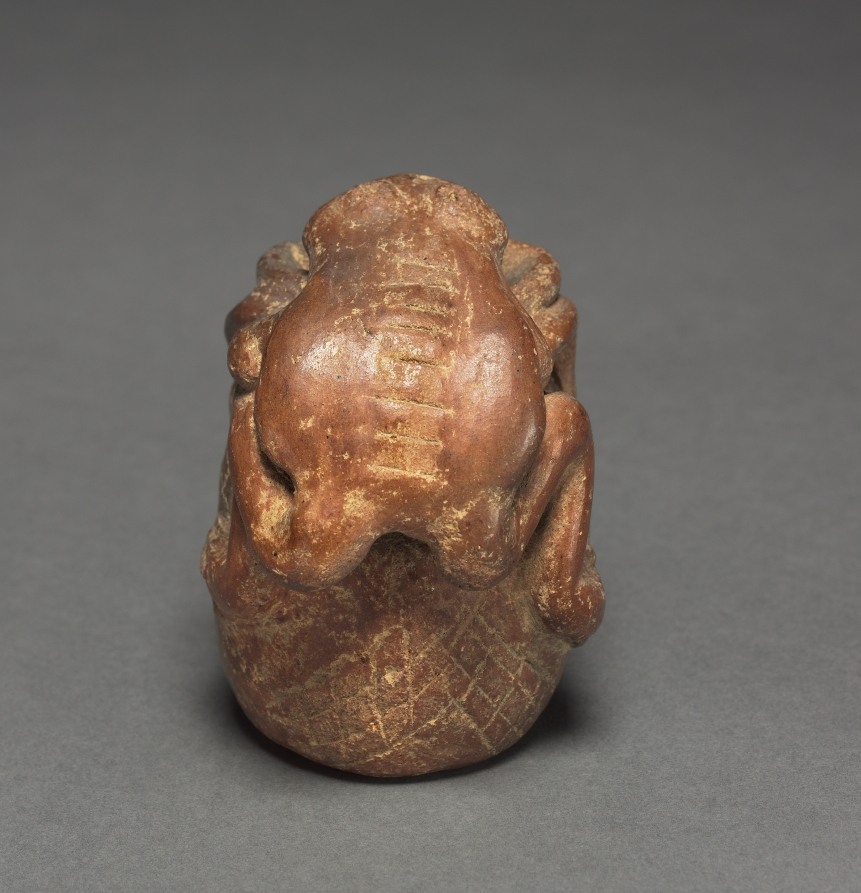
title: Jar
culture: Colombia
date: before 1921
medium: red ware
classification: Ceramic